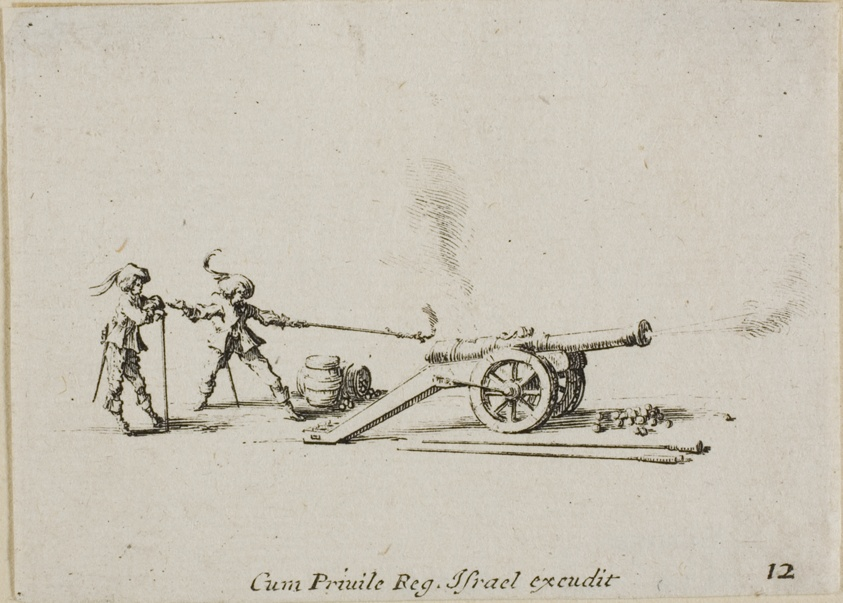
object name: Print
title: Firing the Canon, plate twelve from The Military Exercises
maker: Jacques Callot (French, 1592-1635); published by Israël Henriet (French, 1590-1661)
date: published 1635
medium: Etching on paper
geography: France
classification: etching; print; prints and drawing